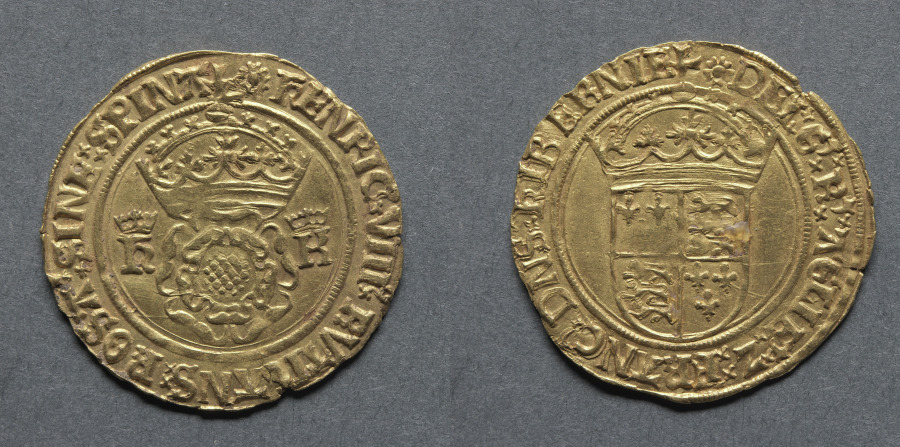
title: Crown of the Double Rose: Crowned Double Rose (obverse); Crowned Royal Arms (reverse)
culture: England, Henry VIII, 1509-1547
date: 1526–33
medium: gold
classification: Coins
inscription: HENRIC VIII RUTILANS ROSA SINE SPINE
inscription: DEI GR ANGLIE Z FRANC DNS HIBERNIE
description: For the first time the Crown of the Double Rose makes it appearance. On these coins the motto Rutilans Rosa Sine Spine, a dazzling rose without a thorn, follows the king's name on the obverse. The crowned initials on either side of the rose are those of Henry and his first queen, Katherine (or Catherine) of Aragon. Since Henry divorced Katherine in 1533, the date of this piece must fall between 1526 and 1533. It was this divorce which helped to bring about the fall of the famous Cardinal Wolsey, the beheadings of Sir Thomas More and Bishop Fisher, and the separation of the English Church from that of Rome.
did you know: Henry VIII placed the initials of three of his queens on some of his coins, the only occasion on which this has been done on the English coinage.